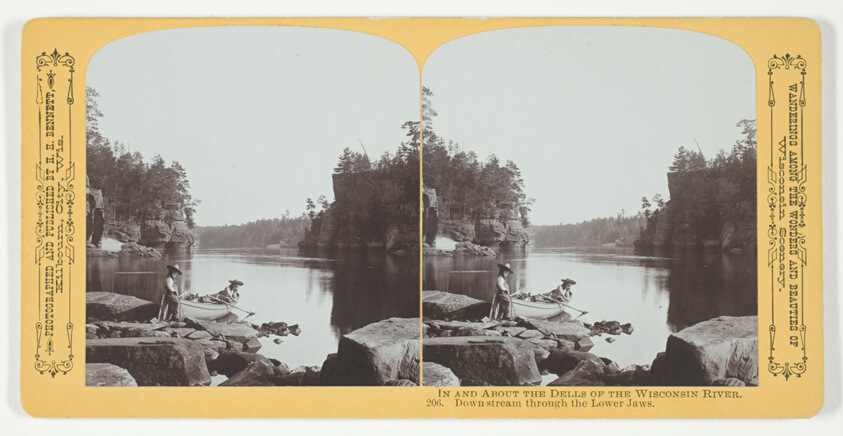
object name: Photograph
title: Down stream through the Lower Jaws, No. 206 from the series "In and About the Dells of the Wisconsin River"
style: 19th century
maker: Henry Hamilton Bennett (American, born Canada, 1843-1908)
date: 1870/1908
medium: Albumen print, stereo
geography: Wisconsin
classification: photography; photograph; albumen silver print; stereograph (albumen)